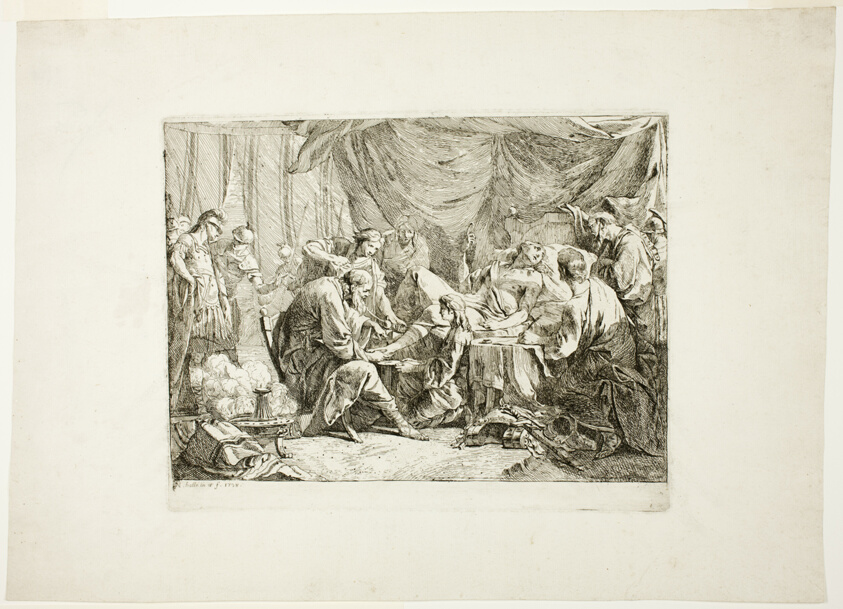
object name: Print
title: Antiochus, After his Demise, Dictated his Will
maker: Noël Hallé (French, 1711-1781)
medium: Etching on ivory laid paper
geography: France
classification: etching; print; prints and drawing